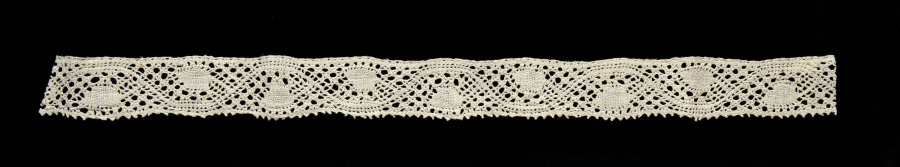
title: Lace Edging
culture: Italy, Abruzzi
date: 1800s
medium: Linen: bobbin lace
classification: Lace